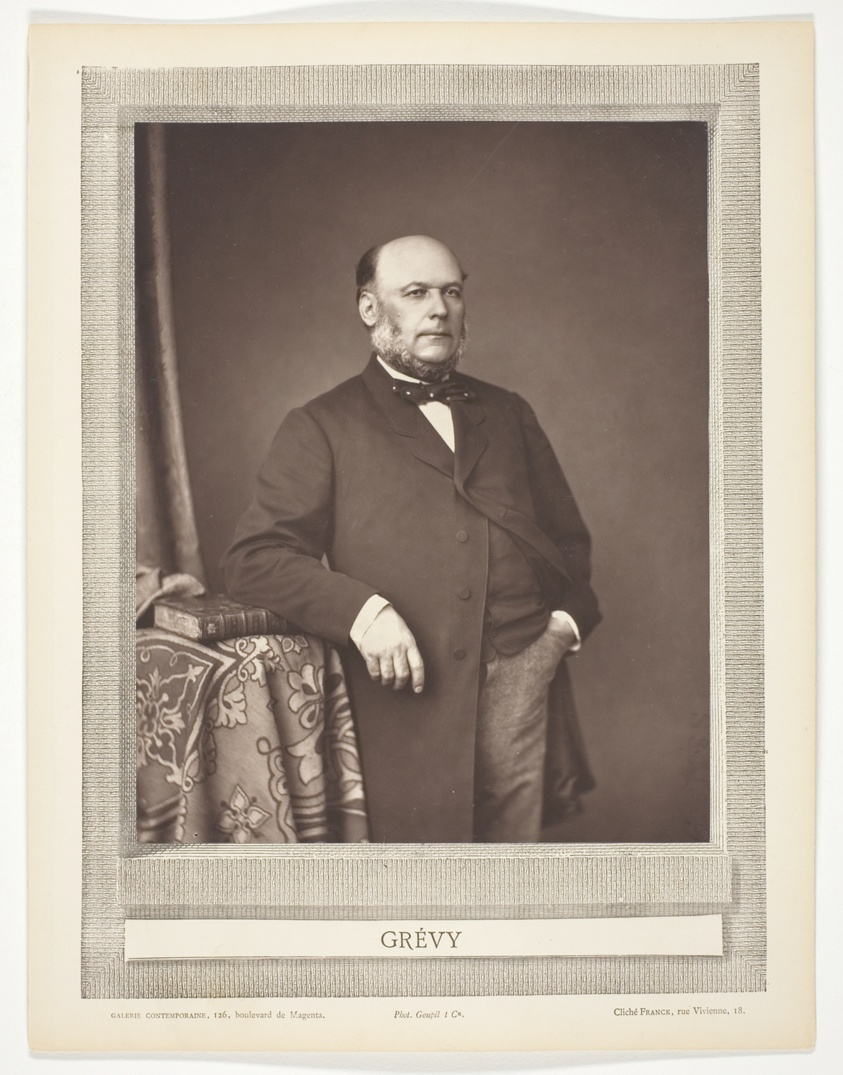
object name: Photograph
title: Grévy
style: 19th century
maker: Franck (probably French, 19th century)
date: c. 1880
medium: Woodburytype, from the periodical “Galerie Contemporaine Littéraire, Artistique”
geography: France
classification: woodburytype; photomechanical process; photography; photograph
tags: Collected by Hugh Edwards, Contemporaine Littéraire